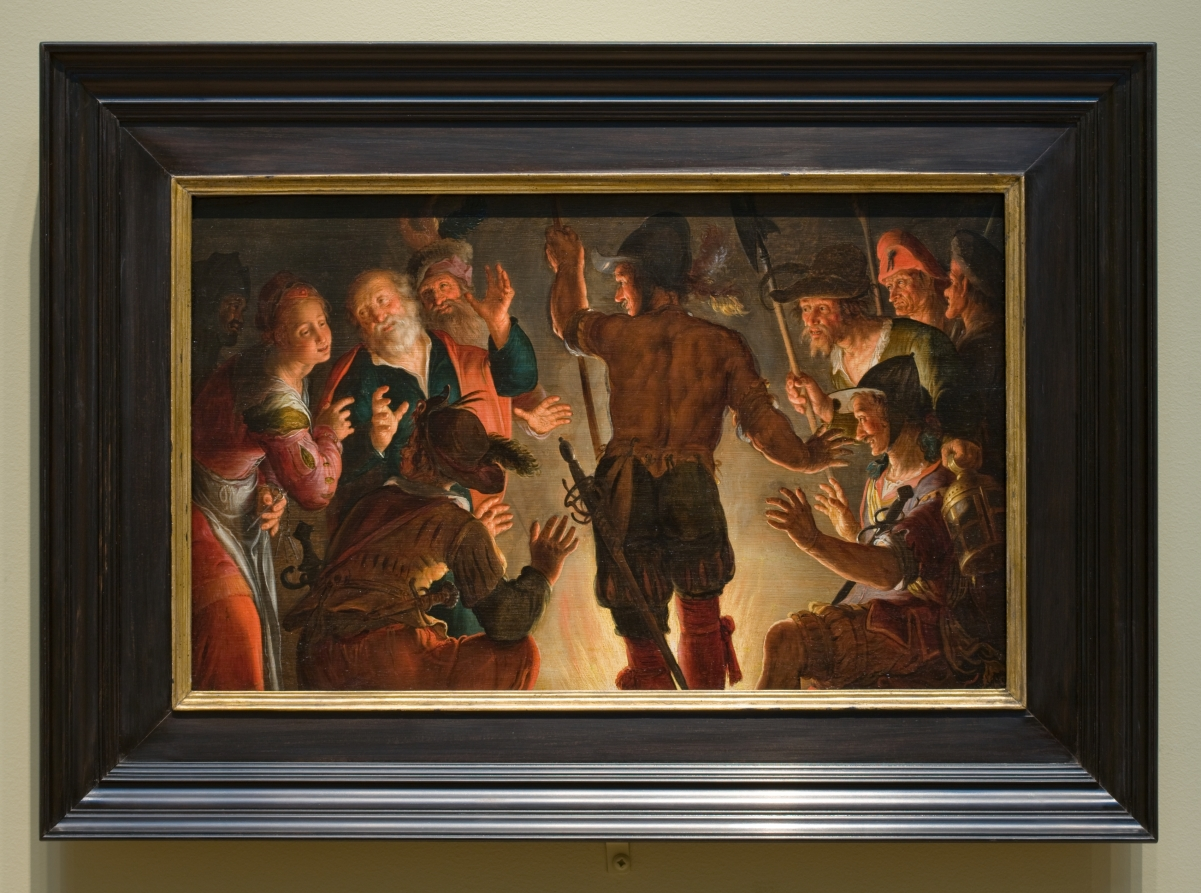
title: The Denial of Peter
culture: Netherlands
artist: Peter Wtewael (Dutch, 1596–1660)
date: c. 1624–28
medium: oil on wood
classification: Painting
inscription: Signed upper right: "Pet[...] / W[...]"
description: Wtewael depicted the moment after the Last Supper when the apostle Peter (at the left) denied knowing Jesus in order to protect himself from Roman soldiers searching for Christ's followers. Few works by this artist are known, and he draws on an unusual combination of styles. The dramatic use of light derives from Dutch followers of the Italian painter Caravaggio, in vogue around 1625, while the twisting bodies, startlingly low viewpoint, and tight detailing come from a more refined, courtly mode more popular earlier in the century.